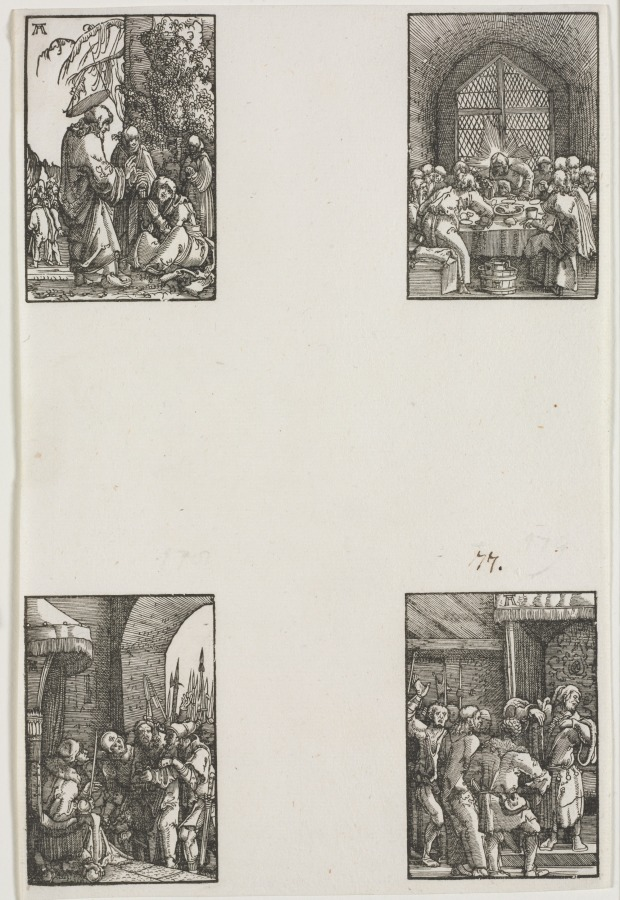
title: The Fall and Redemption of Man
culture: Germany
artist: Albrecht Altdorfer (German, c. 1480–1538)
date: c. 1515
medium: woodcut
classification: Print